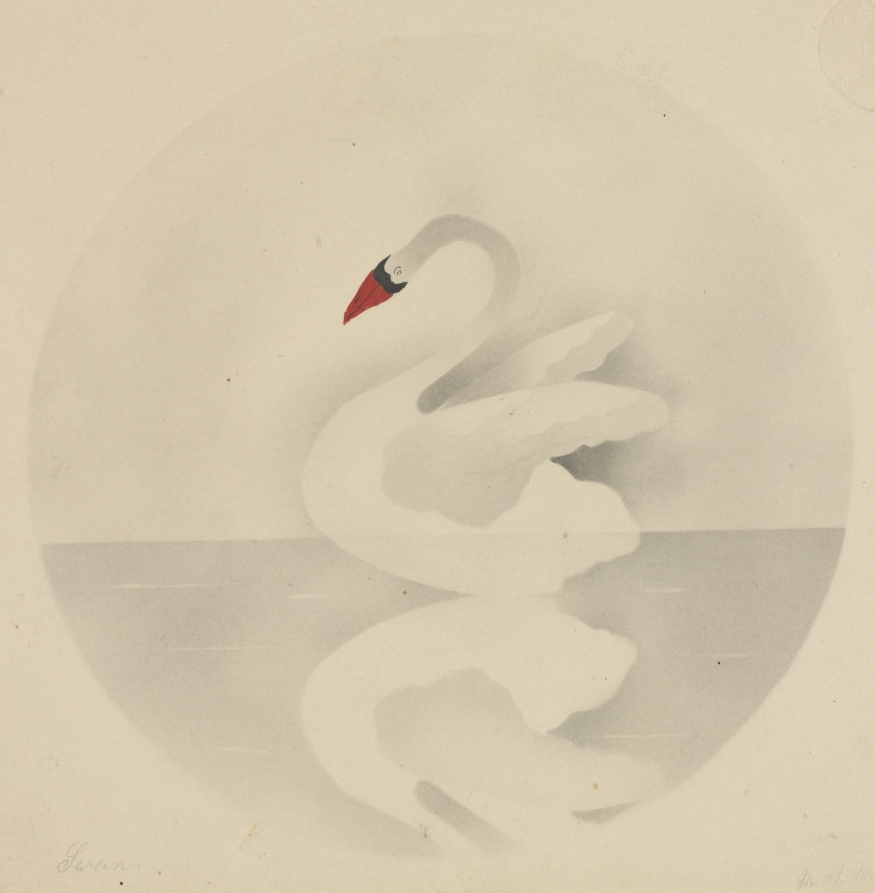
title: Swan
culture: America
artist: Mary Altha Nims (American, 1817–1907)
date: 1800s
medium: pencil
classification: Drawing